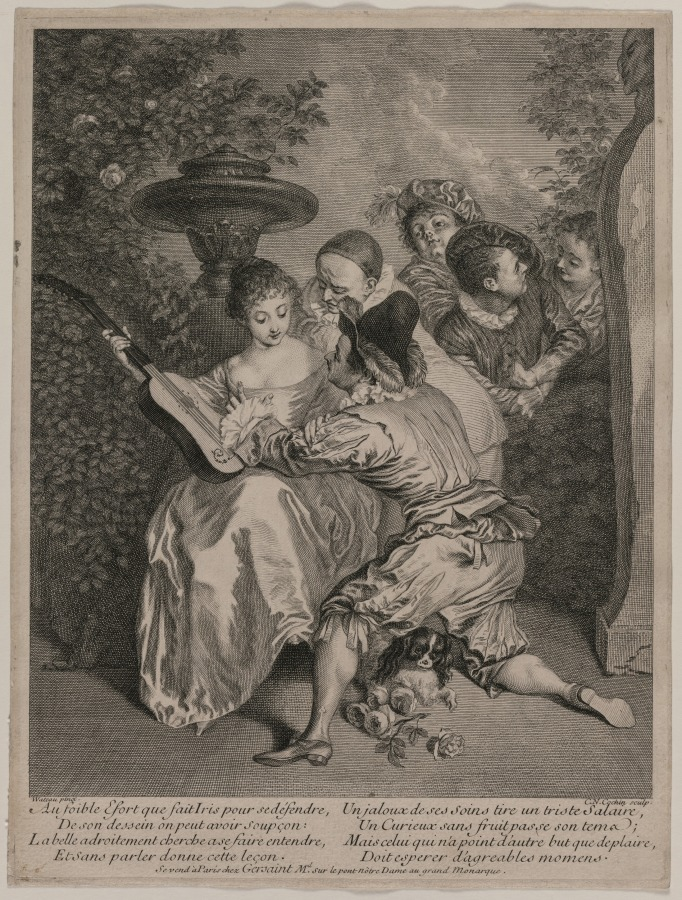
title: The Romancer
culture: France, 18th century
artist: Charles-Nicolas Cochin (French, 1715–1790)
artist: after Jean-Antoine Watteau (French, 1684–1721)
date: 1727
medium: engraving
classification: Print